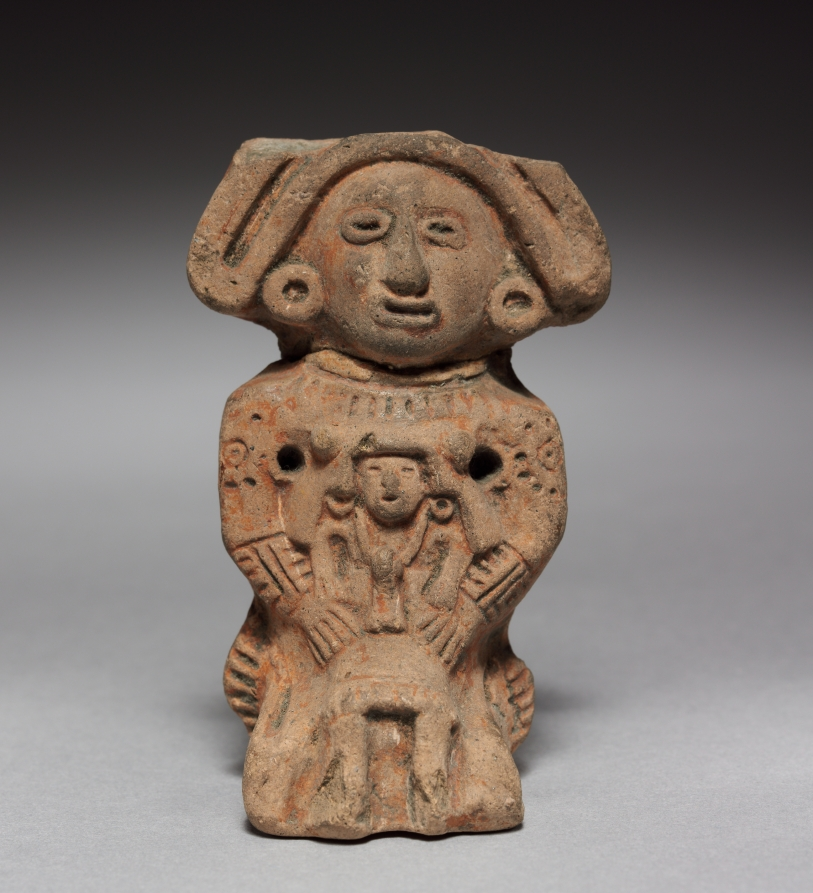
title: Figurine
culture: Mexico, Aztec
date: 1325–1521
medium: pottery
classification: Ceramic